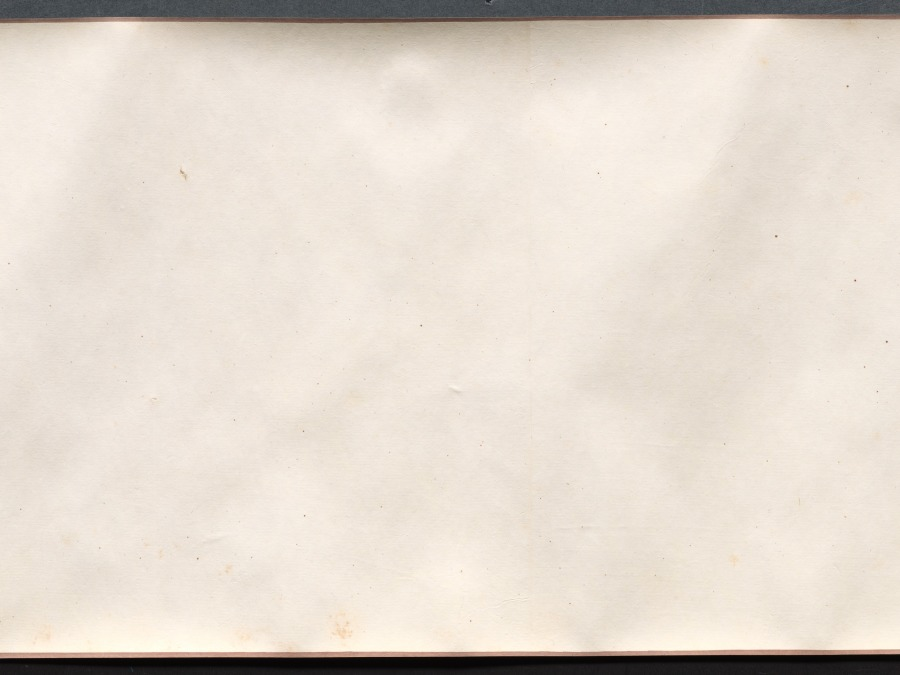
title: Four Poems: Calligraphy in Cursive Script (xingshu)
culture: China, Ming dynasty (1368–1644)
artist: Chen Jiru (Chinese, 1558–1639)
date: 1500s-1600s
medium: handscroll; ink on gold speckled paper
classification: Calligraphy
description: Written in graceful calligraphy with well-composed characters, the artist communicates his thoughts and state of mind in four poems. Characters written in dark, thick strokes convey rhythm, and indicate the moment after the writer had paused to recharge his brush with ink. Chen Jiru was a native of Huating (modern Shanghai). His calligraphy style resembles that of his friend, influential calligrapher Dong Qichang (1555–1636). Unlike Dong, Chen did not pursue government service: he burned his Confucian robes, declined a summons to serve at court, and immersed himself in literature, calligraphy, and painting.